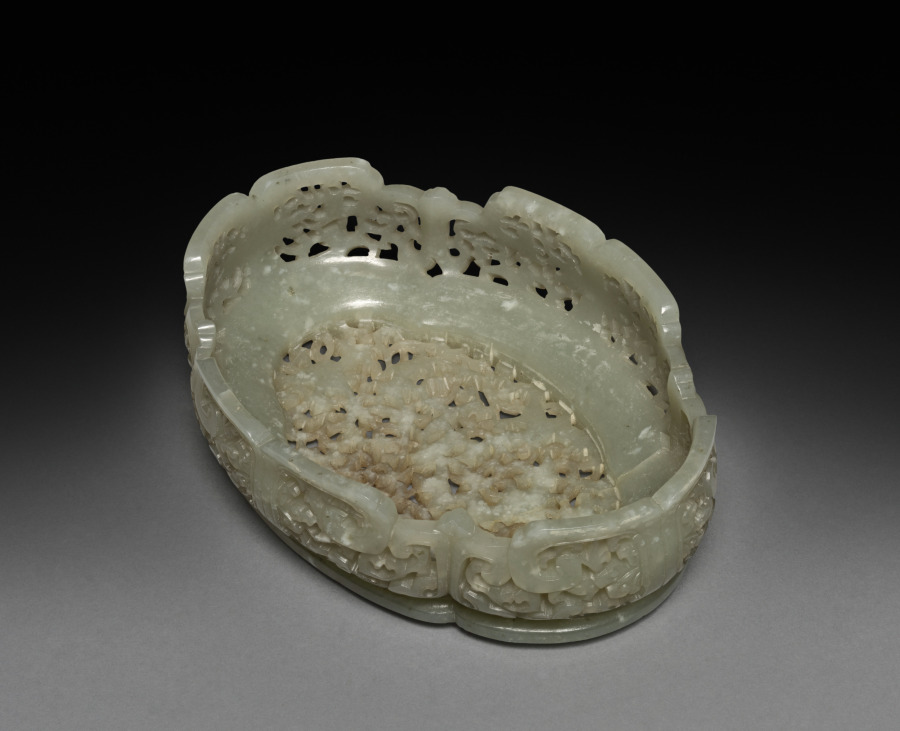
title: Oval Stand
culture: China, Qing dynasty (1644–1911), Qianlong reign (1736–95)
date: 1700s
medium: jade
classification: Jade